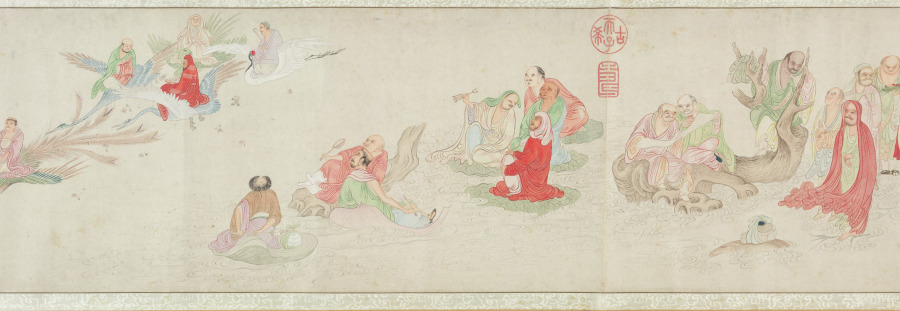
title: The Five Hundred Arhats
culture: China, Ming dynasty (1368–1644)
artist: Wu Bin (Chinese, active c. 1591–1626)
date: 1591–1626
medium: Handscroll; ink and color on paper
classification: Painting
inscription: 枝隱頭陀吳彬齋心拜寫 [印]吳彬之印; 文中父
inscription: 7 seals of Qianlong emperor (r. 1736–95): Gu xi tian zi 古希天子; Shou 壽; Qianlong jian shang 乾隆鑑賞; San xi tang jing jian xi 三希堂精鑑璽; Yi zi sun 宜子孫; Tai shang huang di zhi bao 太上皇帝之寳; Qian qing gong bao 乾清宮寶.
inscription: 6 seals of Cheng Qi 程琦 (1911–1988): Ke an geng zi wu shi yi hou suo de ming ji 可菴庚子五十以後所得名跡; 5 other Cheng Qi seals.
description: More than 66 feet long, this handscroll depicts 447 luohans, 72 attendants, and the bodhisattva of compassion at its very end. Luohans (arhats in Sanskrit), disciples of the Buddha and protectors of the Buddha’s law, possess supernatural powers and take on myriad external appearances. The amusing assortment of characters are engaged in an array of religious, secular, and miraculous activities. The painter used stylistic features borrowed from earlier artists, carefully controlled lines, and refined coloring. Wu Bin was a lay Buddhist and depicting this sort of image was part of a religious practice seeking understanding of the Buddha’s teaching.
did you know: Far advanced on the path to enlightenment, arhats have the capacity to tame tigers, free dragons, and to float on water or in the air.